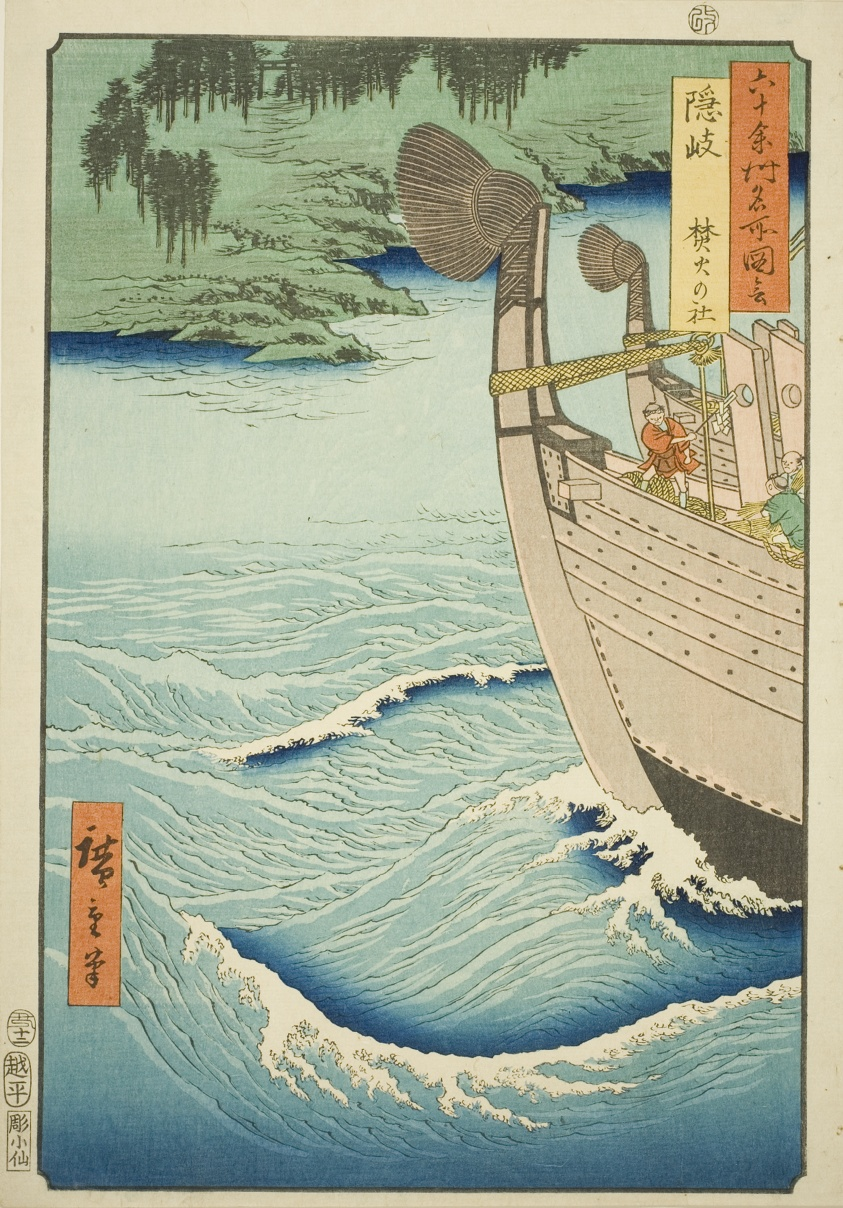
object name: Print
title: Oki Province: Takuhi Shrine (Oki, Takuhi no yashiro), from the series "Famous Places in the Sixty-odd Provinces (Rokujuyoshu meisho zue)"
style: Japanese (culture or style)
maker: Utagawa Hiroshige 歌川 広重; Japanese, 1797-1858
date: 1853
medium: Color woodblock print; oban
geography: Japan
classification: woodblock print; print; asian art